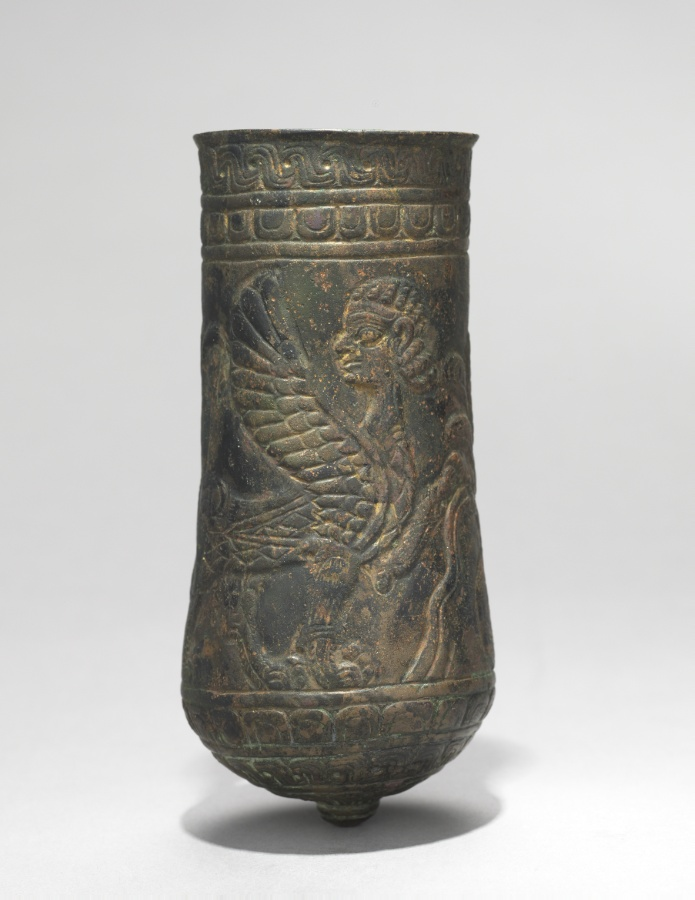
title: Button-Based Situlas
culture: Iran, Luristan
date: 900–700 BCE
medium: bronze, repoussé, punched, incised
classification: Metalwork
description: The metalworkers of Luristan provided the Assyrian empire with elaborate bronze ornaments and vessels. These two situla have symmetrical decoration—one with ibexes drinking from an overflowing water jar; the other, with sphinxes.